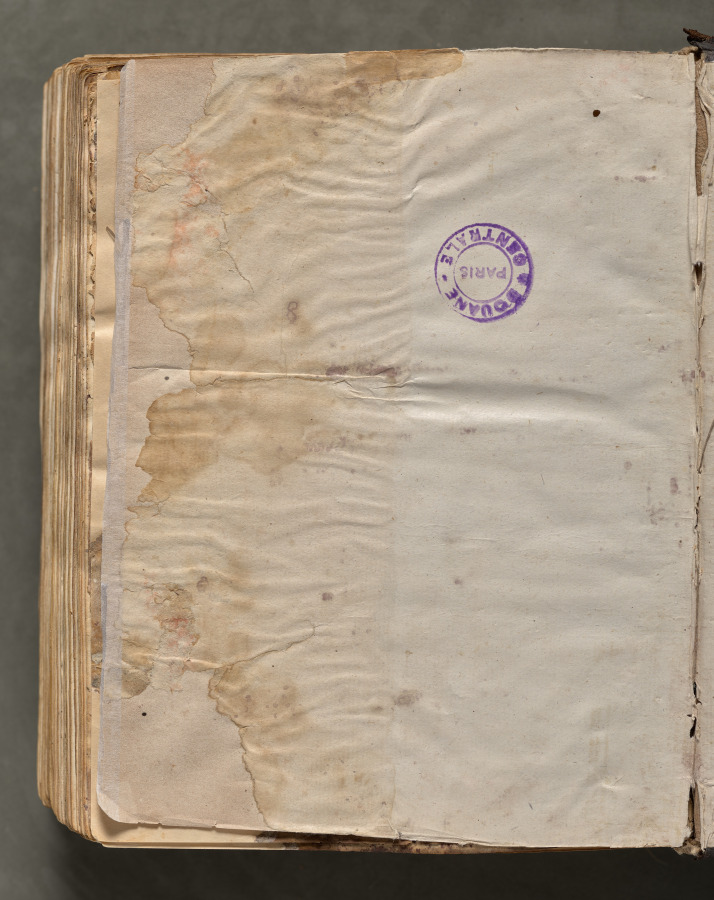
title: Text, folio 428 (verso), from a Gospel Book with Commentaries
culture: Byzantium, Constantinople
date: c. 1000–1100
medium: ink, tempera, and gold on vellum; leather binding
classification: Bound Volume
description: Each of the four gospels in this book opens on a page with brilliantly illuminated borders depicting the author of the text as well as birds—principally peacocks, symbols of the immortality of the soul—and fountains, representing the fountain of life and the salvation of the soul. This volume consists of 428 leaves with texts in Greek. Its level of sophistication suggests that it was probably written and decorated in a monastery in Constantinople.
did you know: Gospel books were carried in procession through Byzantine churches.